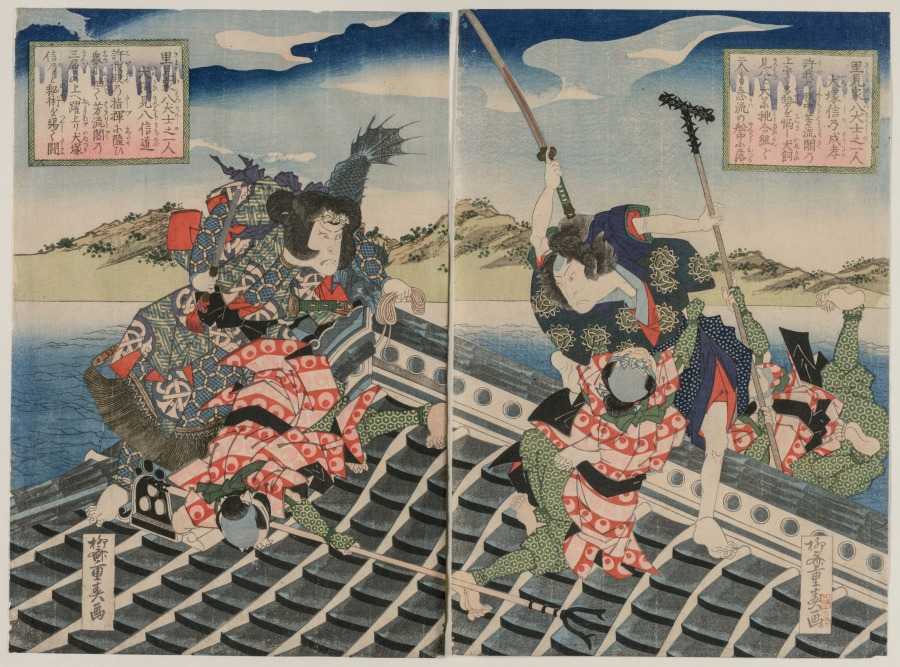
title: Arashi Rikan II as Inuzuka Shino Moritaka and Nakamura Utaemon III as Inukai Kenpachi Michinobu Battling (from the series The Eight Heroes of the Satomi Clan)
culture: Japan, Edo period (1615–1868)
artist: Ryūsai Shigeharu (Japanese)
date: 1834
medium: color woodblock print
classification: Print